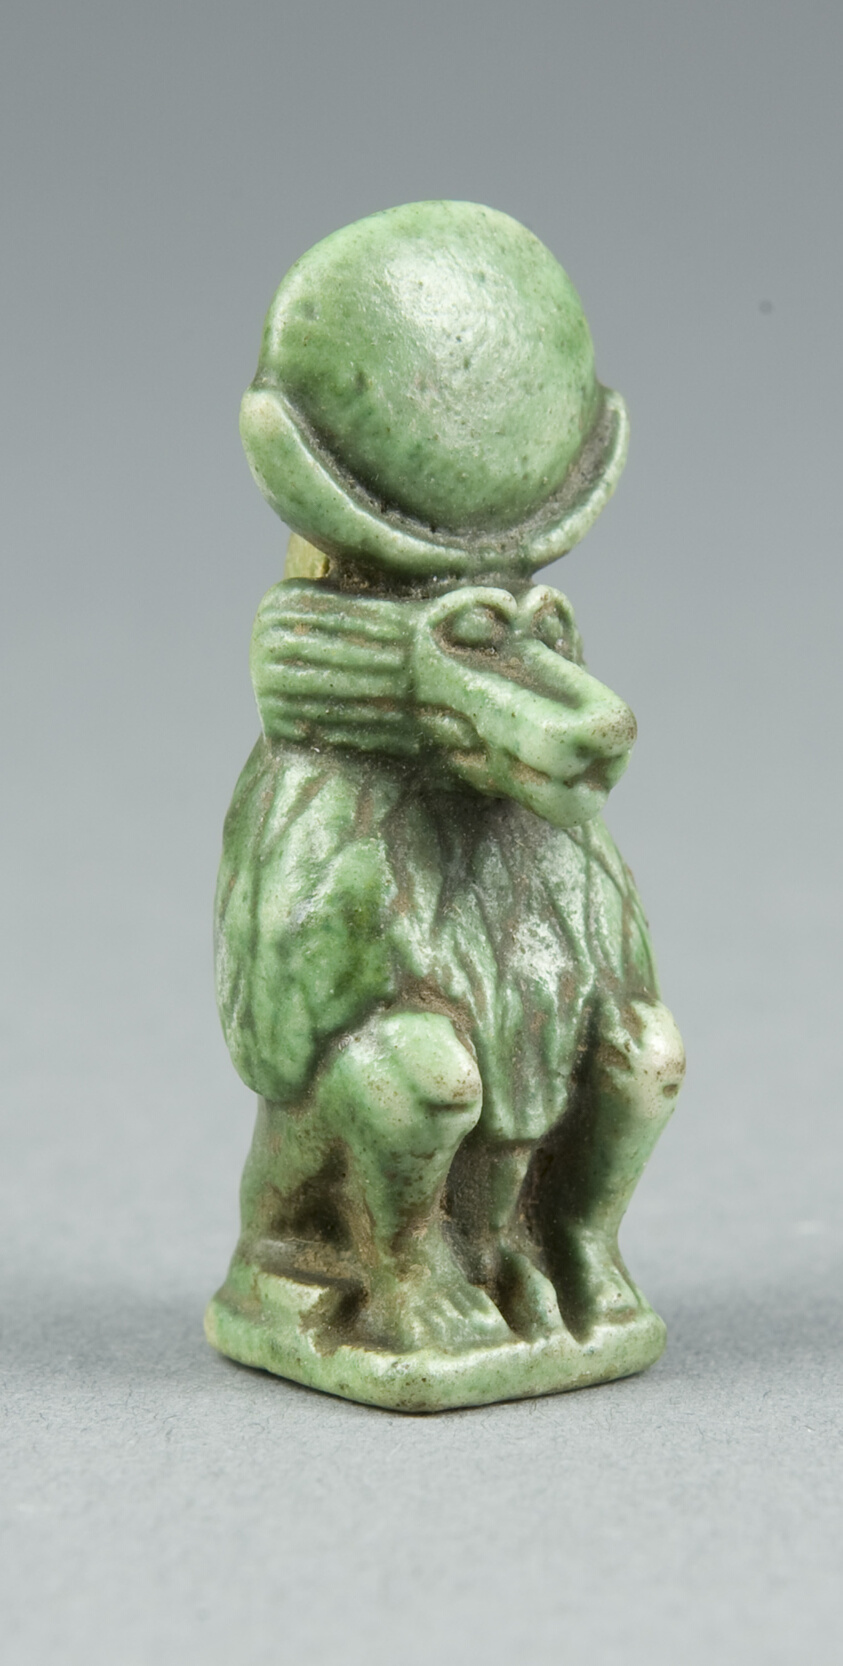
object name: Costume and Accessories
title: Amulet of Thoth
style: ptolemaic, egyptian, ancient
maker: Egyptian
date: Ptolemaic Period (332–30 BCE)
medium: Glazed steatite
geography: Egypt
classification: amulet; jewelry; ceramics; ancient art; costume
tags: gods (deities), moon, deities, baboon